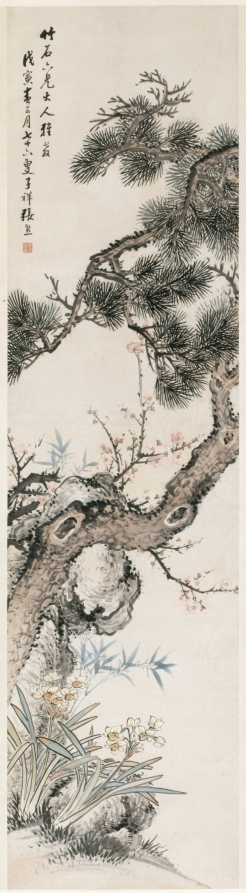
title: Three Purities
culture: China, Xiaxing, Qing dynasty (1644-1911)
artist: Zhang Xiong (Chinese, 1803–1886)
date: 1800s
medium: hanging scroll, ink and color on paper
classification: Painting